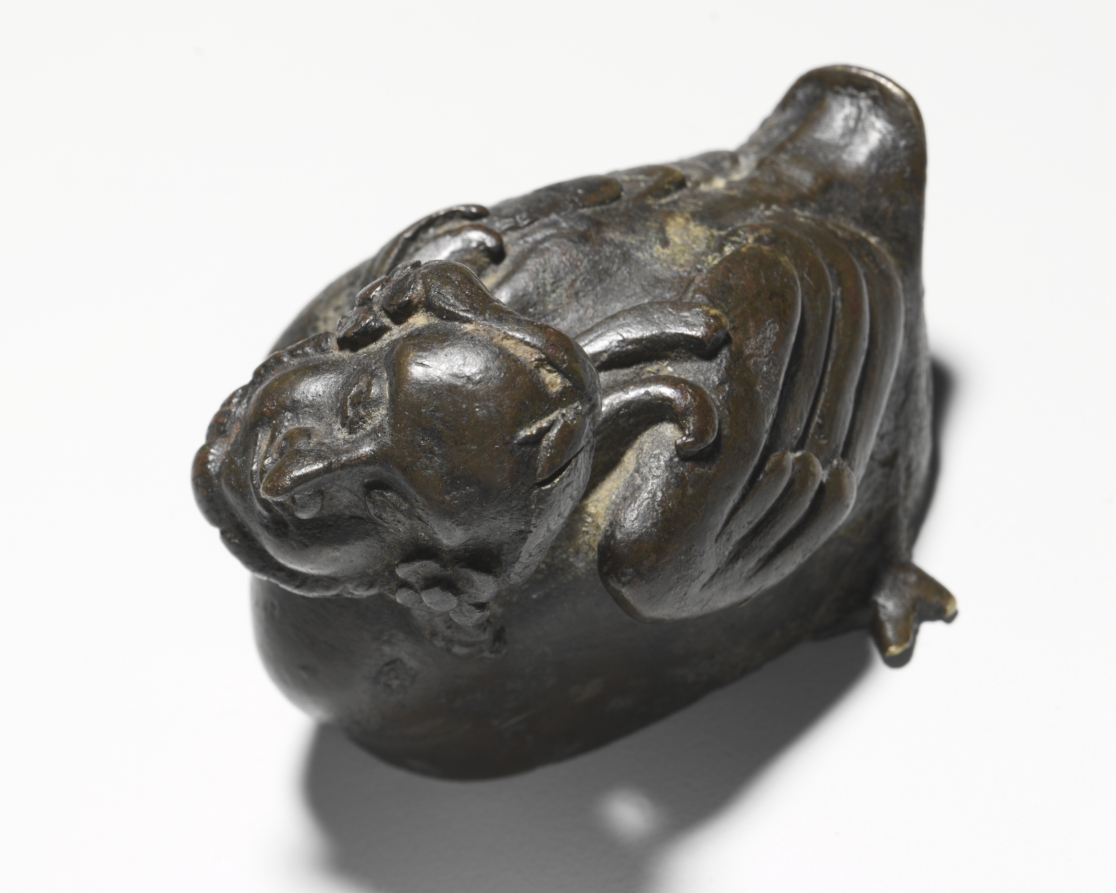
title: Bird with Human Head, possibly Hermes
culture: Pakistan, Gandhara, Kushan period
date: c. 200s–300s CE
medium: bronze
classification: Sculpture